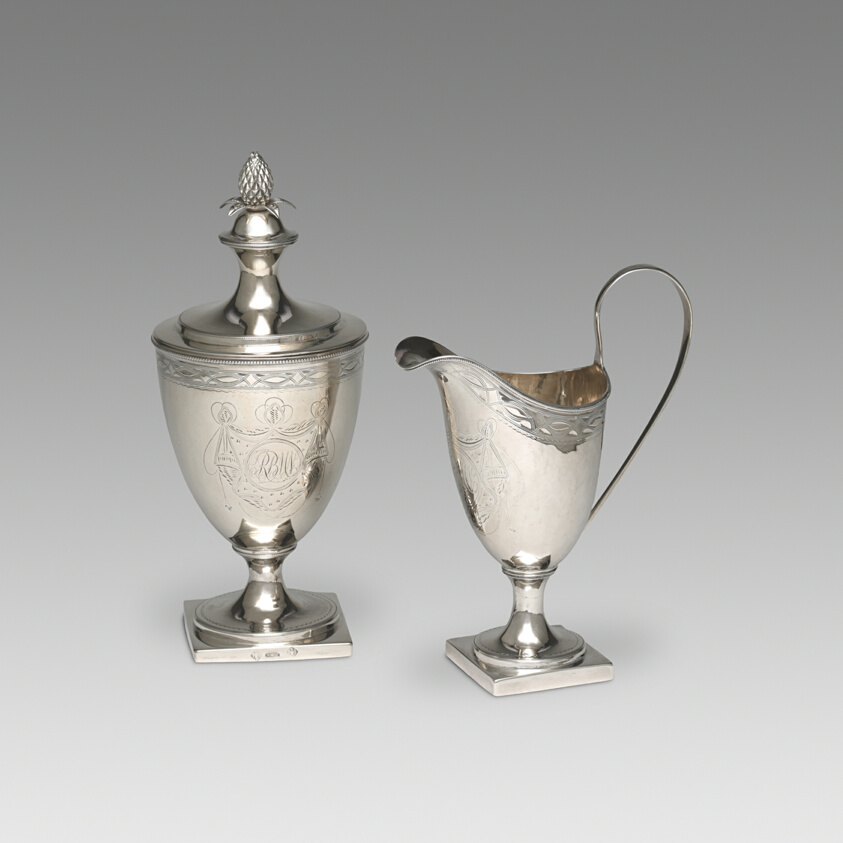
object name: Metalwork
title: Sugar Urn and Cream Pot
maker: Daniel Van Voorhis; American, 1751–1824; New York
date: c. 1793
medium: Silver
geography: New York City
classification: sugar bowl; creamer; silver; american decorative arts; american arts; decorative arts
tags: dining, drinking